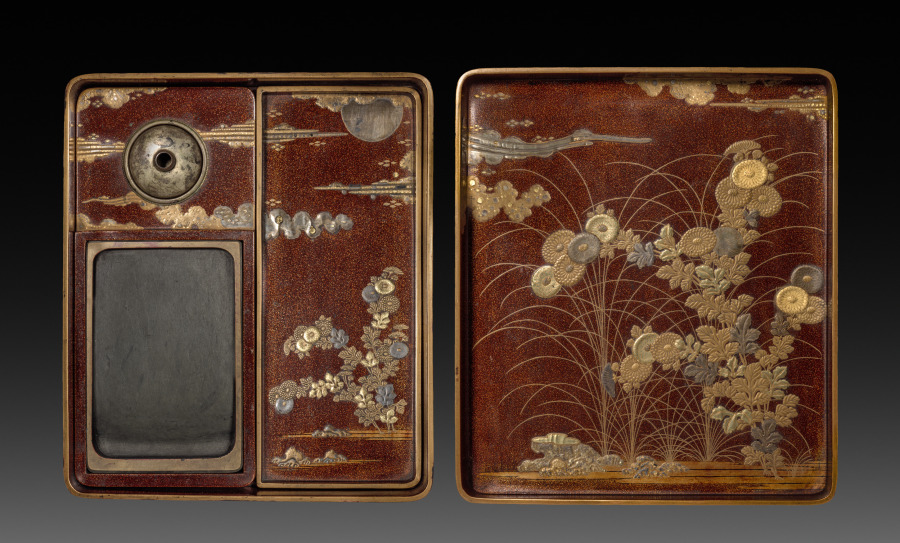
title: Writing Box (Suzuribako) with Phoenix in Paulownia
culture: Japan, Momoyama period (1573–1615)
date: late 1500s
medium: Lacquer on wood with sprinkled gold and silver powder (maki-e) and gold and silver foil application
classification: Lacquer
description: The only place the mythical phoenix will perch is in the paulownia tree. Along with the dragon, the bird is a symbol of imperial power in East Asia. This box––a container for an inkstone, brushes, and ink––is both functional and lavish, its dramatic effects achieved with a pear-skin ground decoration (nashiji) and sprinkled powder decoration in high relief (takamaki-e).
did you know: In contrast to the bright, celebratory motifs on the exterior, the interior of the box invites a more reflective mood with its autumn moonlit sky over chrysanthemums.